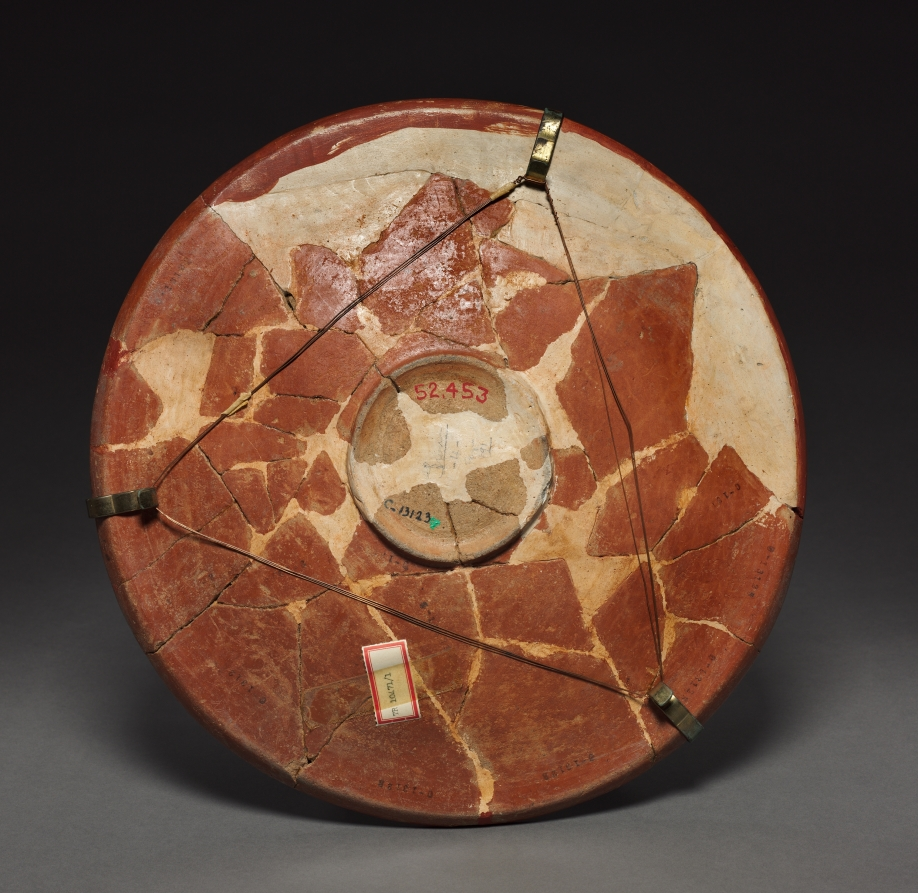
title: Plate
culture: Panama, Cocle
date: 400–1000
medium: pottery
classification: Ceramic